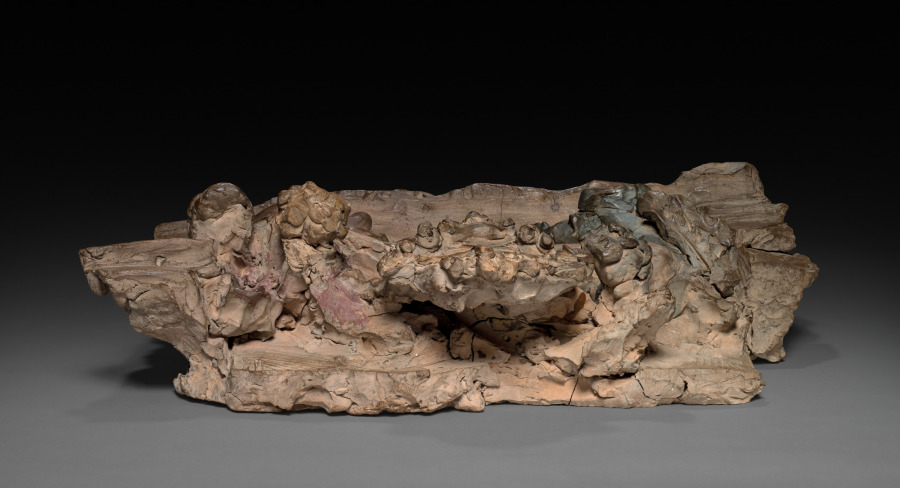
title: Two Angels and Cherubs Bearing an Icon of Christ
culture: Italy, Rome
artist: probably by Paolo Naldini (Italian, 1616–1691)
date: c. 1670–80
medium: terracotta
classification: Sculpture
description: This work is probably a study for a large altarpiece that would have combined several materials, including marble, stucco, and paint. The artist modeled his design in soft clay, which was then hardened by firing; subtle tints suggest the richness of the finished work. The idea of using sculptural figures to support a painted image within an altarpiece was influenced by the work of the Roman sculptor Gian Lorenzo Bernini (1598–1680), with whom Naldini is known to have worked.